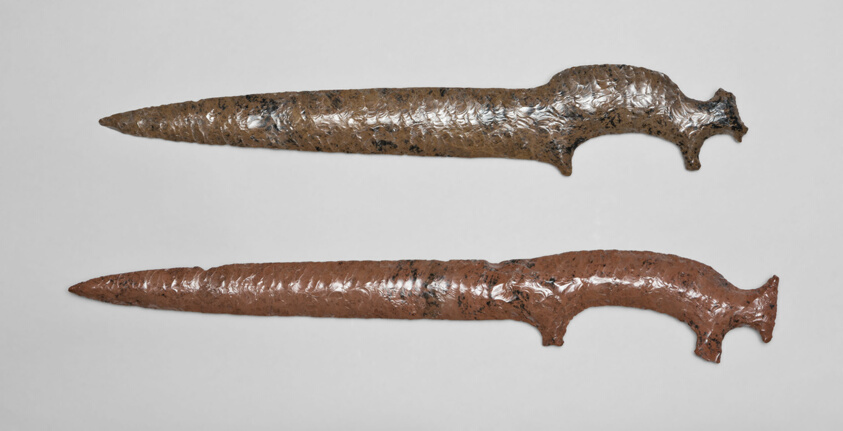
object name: Sculpture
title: Ceremonial Knife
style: colima, americas, mesoamerican, west mexico, Arts of the Americas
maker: Colima (Colima, Mexico)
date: c. 200 CE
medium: Obsidian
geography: Colima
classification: stone; art of the americas; ceremonial object; sculpture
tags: ceremonial objects, weapons